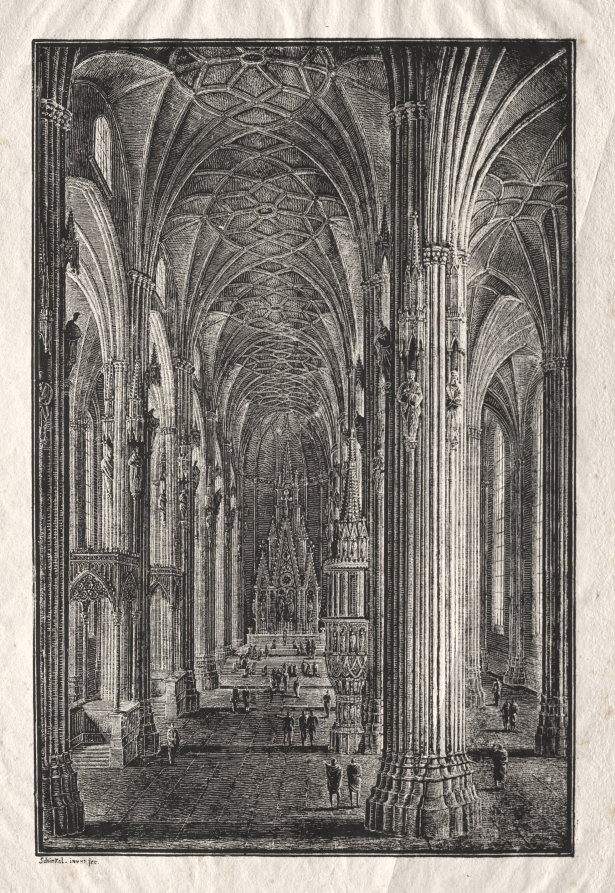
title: Interior of St. Stephen's Cathedral in Vienna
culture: Germany, 19th century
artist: Karl Friedrich Schinkel (German, 1781–1841)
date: c. 1810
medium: lithograph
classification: Print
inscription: printed lower left, below image: Schinkel. inv et fec.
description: Renowned as an architect and an imaginative draftsman and painter, Schinkel was an important early practitioner of lithography, a technique invented at the end of the 18th century in Germany. Schinkel experimented with this new medium in creative ways, searching for a means to achieve tone. In order to simulate the effect of bright light illuminating the interior of Saint Stephen's Cathedral, he covered the surface of the stone with lithographic ink and then scratched out the design with a sharp tool. One of only a few impressions of this print, Interior of Saint Stephen's Cathedral in Vienna exemplifies the museum's extensive early lithography collection.